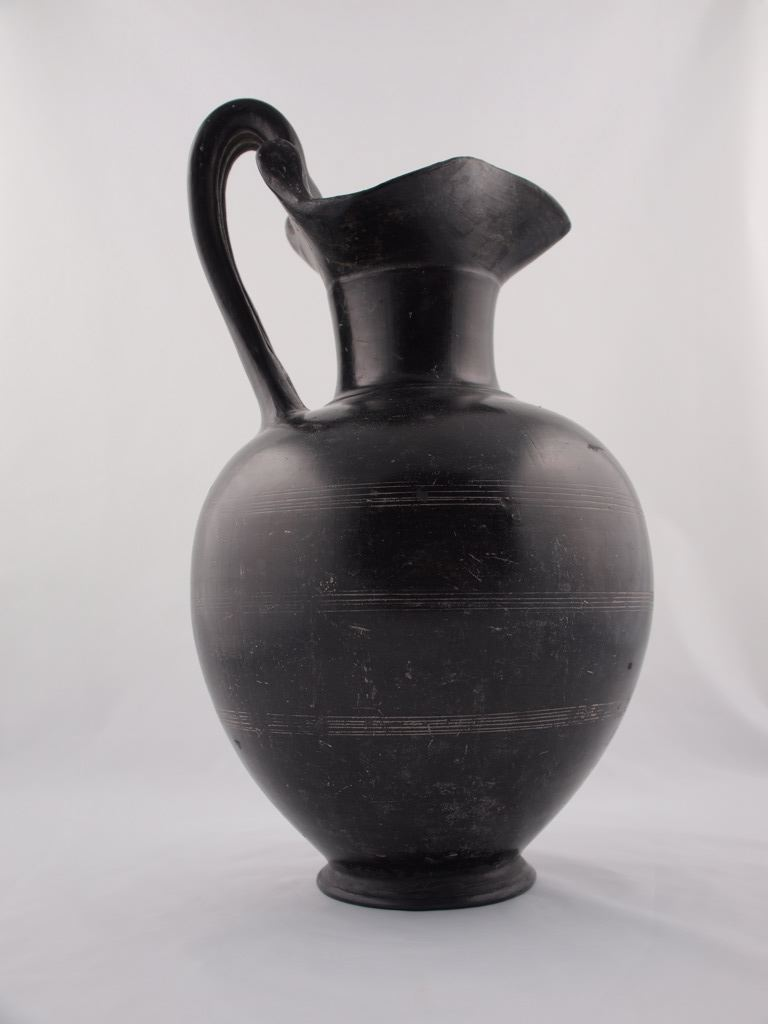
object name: Vessel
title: Oinochoe (Pitcher)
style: etruscan, archaic (greek), ancient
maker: Etruscan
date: 550-500 BCE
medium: terracotta, Bucchero sottile ware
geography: Etruria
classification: pitcher (vessel); ceramics; vessel; ancient art; container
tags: dining, drinking